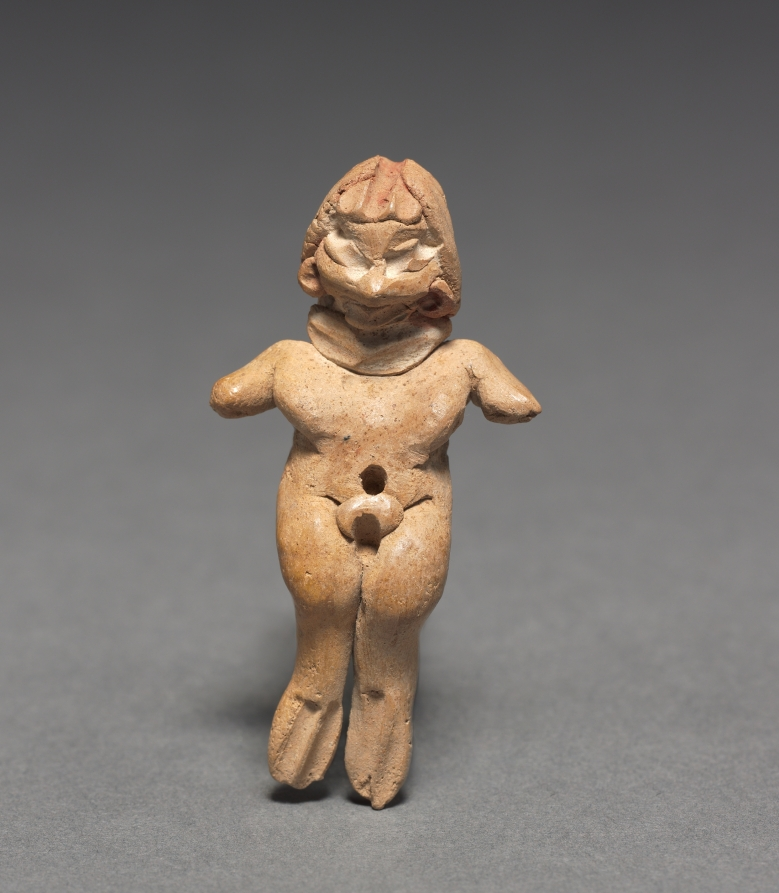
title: Female Figurine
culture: Mesoamerica, Mexico, Guanajuato, Chupícuaro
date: c. 400–100 BCE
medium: earthenware with pigment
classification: Sculpture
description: Small, solid, hand-modeled figurines were a staple of the early Mesoamerican artistic repertoire. Made in distinctive styles corresponding to geographic regions, they likely were used in a variety of contexts, including rites to assure health, fertility, and prosperity. This example is from the Chupícuaro region, north of modern-day Mexico City.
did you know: This figurine is small enough to fit comfortably in the palm of a hand.